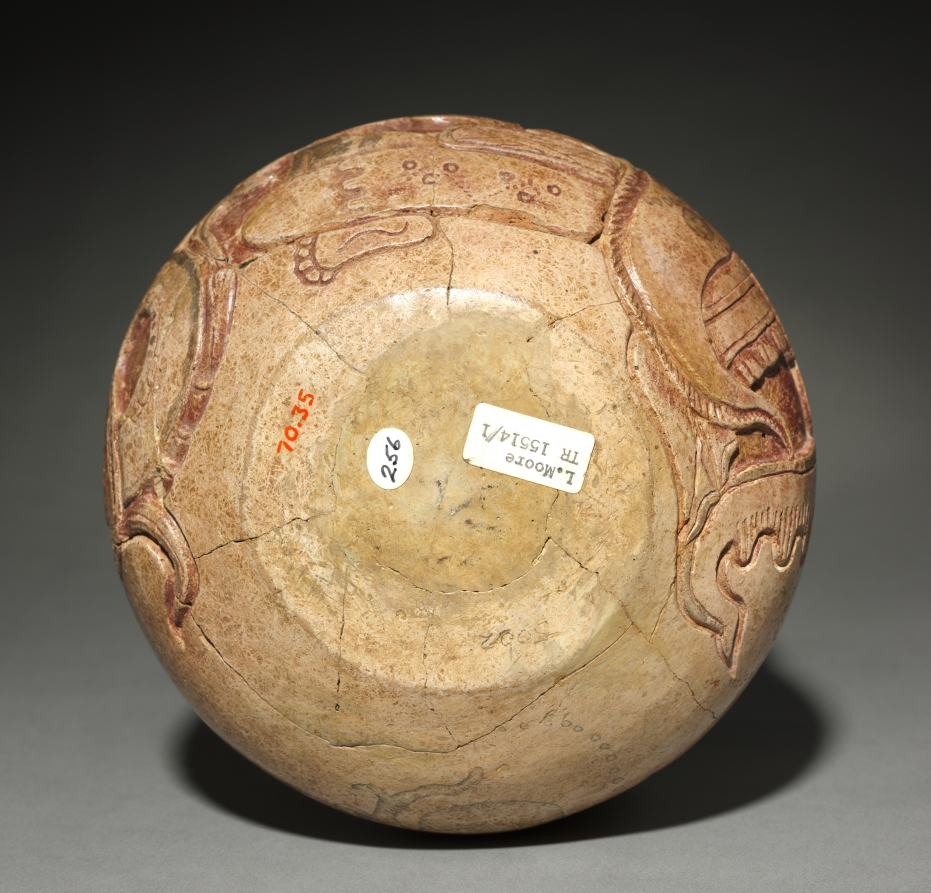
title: Carvel Vessel with an Underworld Diety (God L)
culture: Mexico, Yucatán Peninsula, Maya (Chocholá) style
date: 600–900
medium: earthenware, slip, pigment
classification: Ceramic